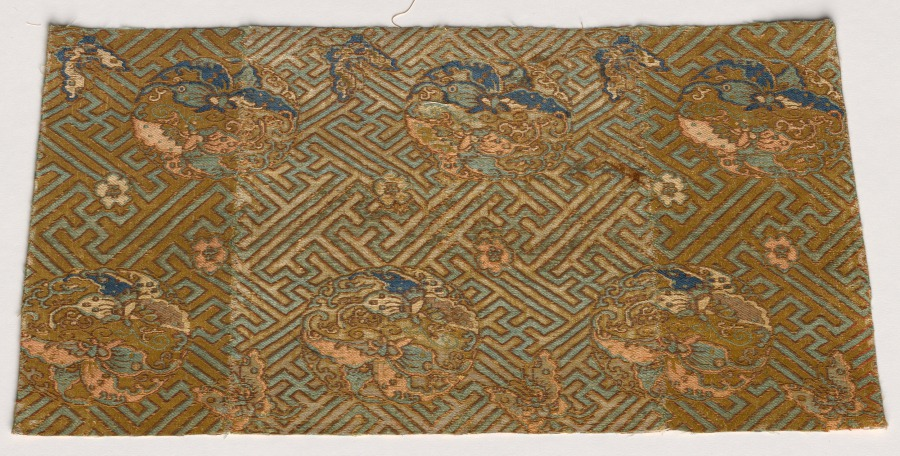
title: Fragment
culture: China, 19th century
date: 1800s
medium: silk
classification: Textile